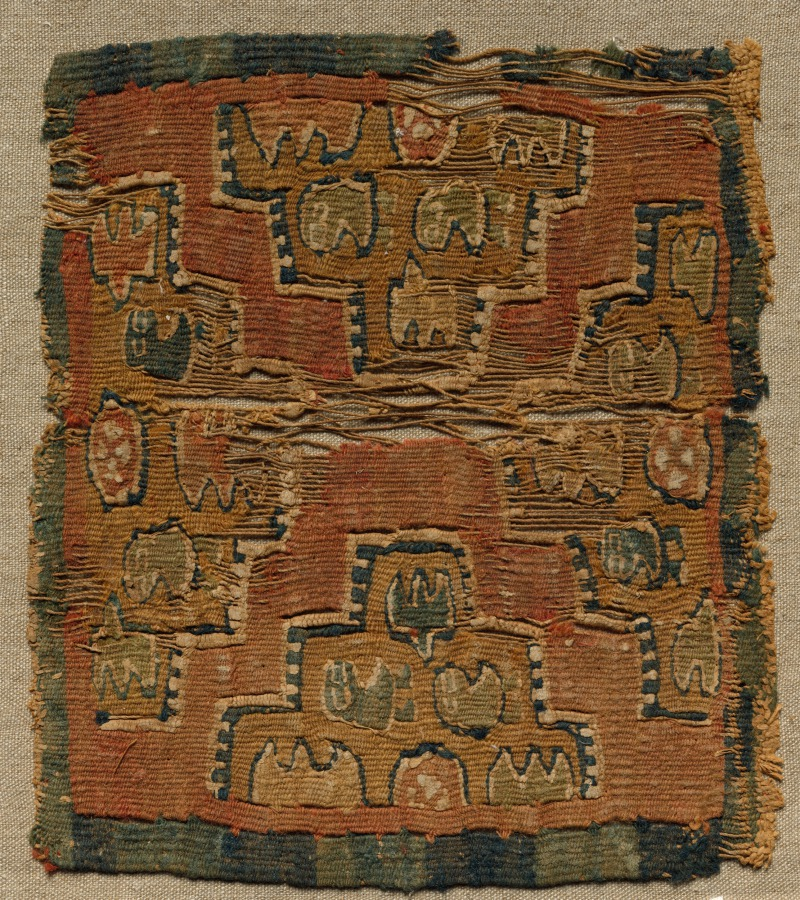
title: Square, Probably a Segmentum from a Tunic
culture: Egypt, Abbasid or Tulunid period, 9th century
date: 800s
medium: tapestry weave; wool and linen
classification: Textile